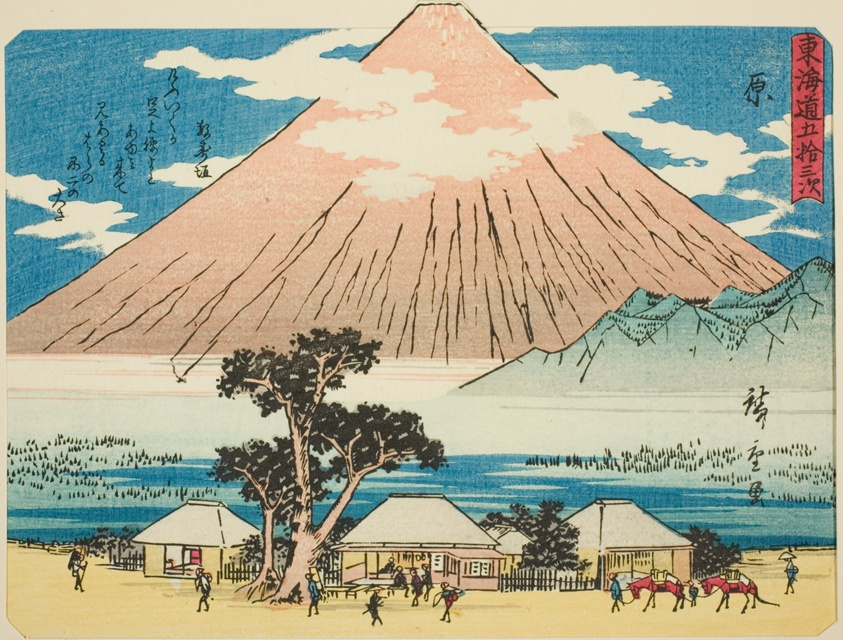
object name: Print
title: Hara, from the series "Fifty-three Stations of the Tokaido (Tokaido gojusan tsugi)," also known as the Tokaido with Poem (Kyoka iri Tokaido)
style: Japanese (culture or style)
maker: Utagawa Hiroshige 歌川 広重; Japanese, 1797-1858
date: c. 1837/42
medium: Color woodblock print; chuban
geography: Japan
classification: woodblock print; print; asian art